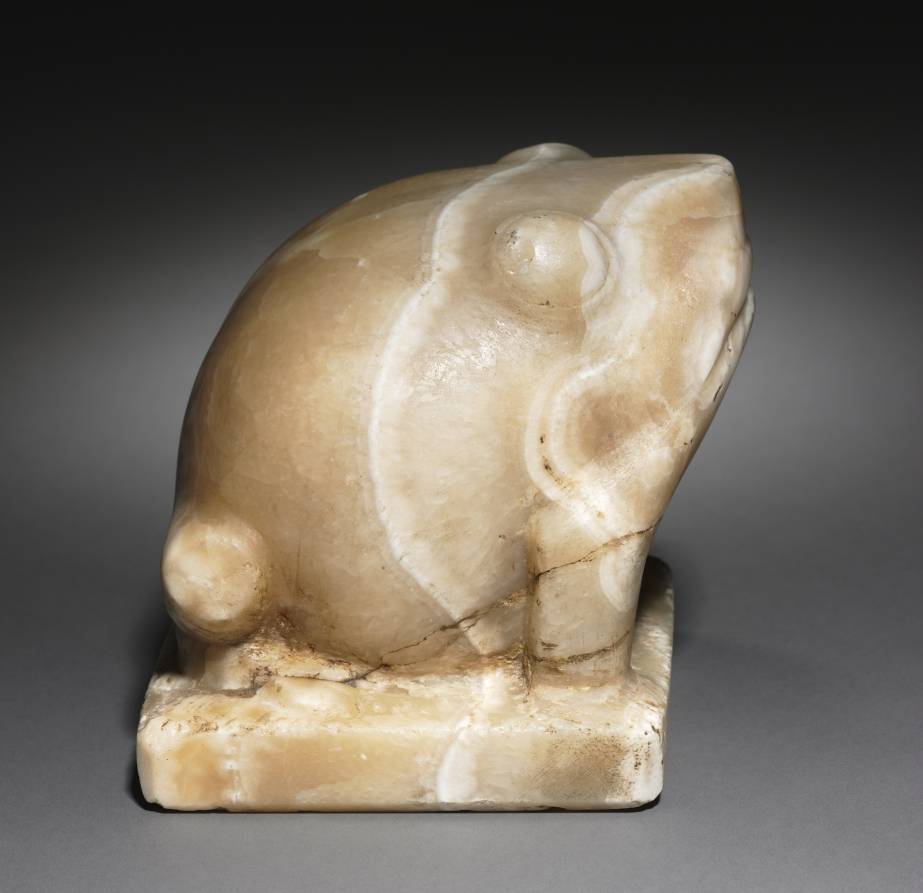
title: Statue of Heqat, the Frog Goddess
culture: Egypt, Predynastic (5000–2950 BCE), Naqada III (3200–3000 BCE)–Egypt, Early Dynastic (2950–2647 BCE), Dynasty 1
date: c. 2950 BCE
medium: travertine (Egyptian alabaster)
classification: Sculpture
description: During the Predynastic period statues of animals are much more common than those of humans. This statue of a frog stands at the beginning of a great tradition of animal sculpture in Egyptian art. The sculptor has shown great sensitivity to the natural banding of the stone, using it to enhance the roundness of the animal's form. Small frogs, mostly of faience, are among the most common votive offerings deposited at early temple sites. The frog's exact religious significance in the Predynastic period is unknown, but in later times it was most often identified with Heqat, the goddess who assisted at childbirth.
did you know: This probably represents a puffed-up Bufo viridis, one of two types of "frogs" (it is actually a toad) represented in Egyptian art.